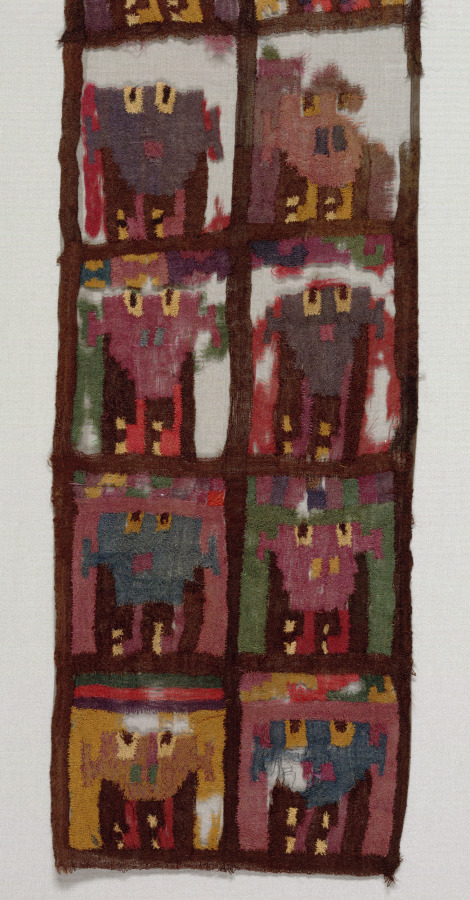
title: Band with Trophy Heads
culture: Peru, South Coast, Nasca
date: 100 BCE–700 CE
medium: interlocking warp and weft, single interlock: wool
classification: Textile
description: This band, remarkable for its intense color and spider-web sheerness, was created using an unusual technique known as discontinuous warp and weft. That is, none of the vertical or horizontal yarns are continuous from one side of the band to the other. Rather, they travel back and forth within their own color areas, linking at the edges with yarns in adjacent areas. This is a difficult feat when weaving on a loom and the creator likely used another approach, such as darning with a needle over a ground cloth that was then removed. The image repeated in each of the band’s rectangles is a head supported on two little feet.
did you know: This band is made in with a weaving technique that is unique to the ancient Andes.